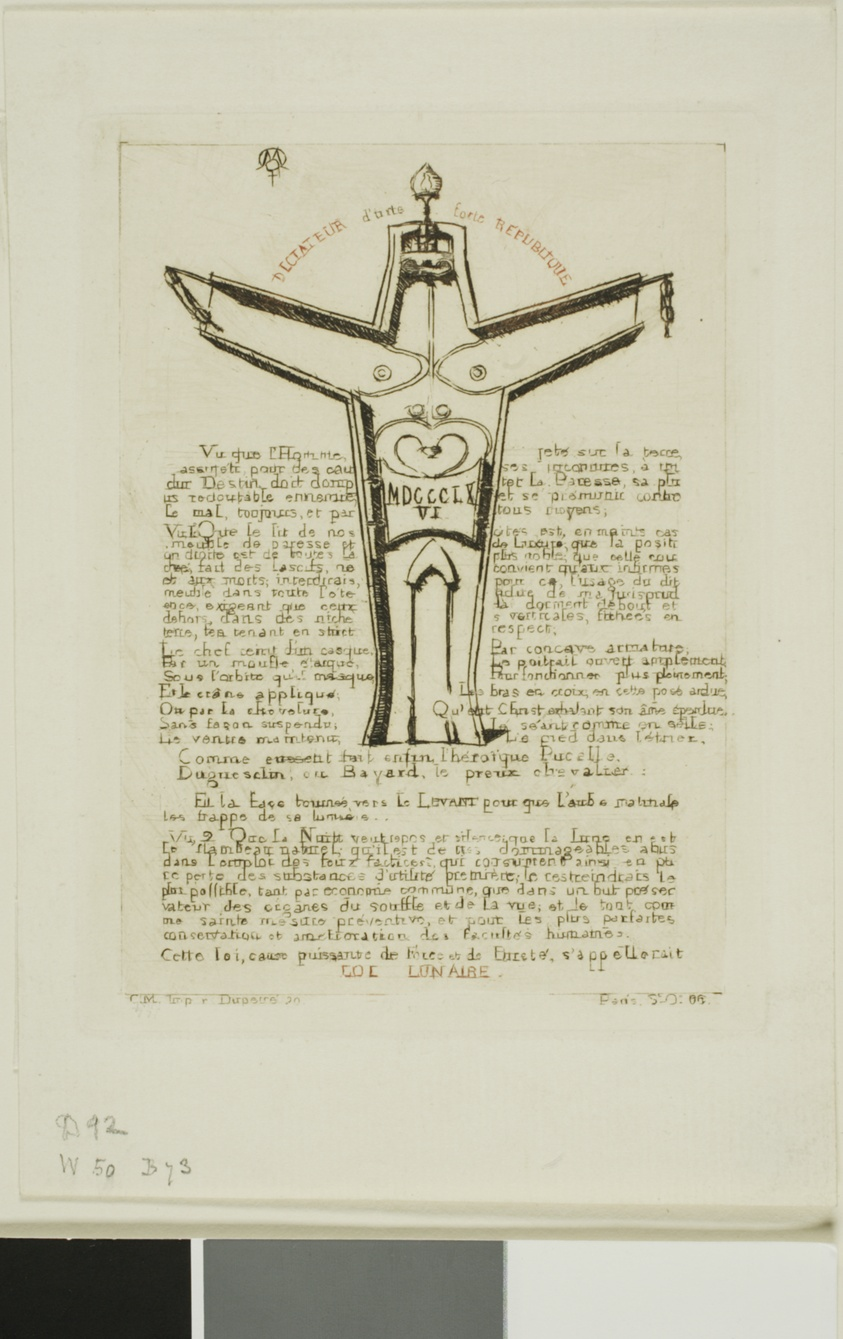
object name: Print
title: Lunar Law, No. 2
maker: Charles Meryon (French, 1821-1868)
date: 1866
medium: Etching in warm black with some printing à la poupée in red ink, on ivory laid paper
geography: France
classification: etching; print; prints and drawing